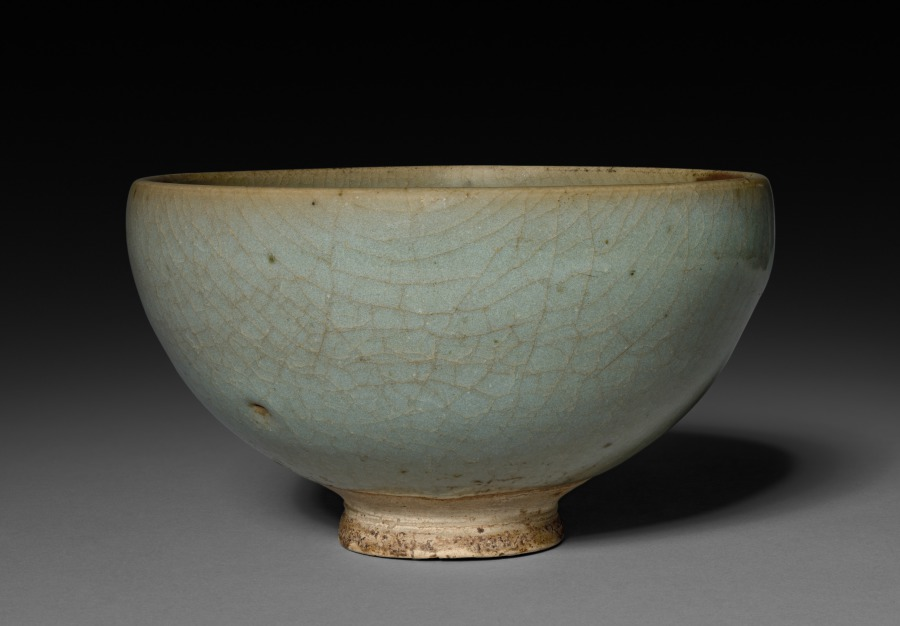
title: Bowl: Jun ware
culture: Northern China, Jin dynasty (1115-1234) - Yuan dynasty (1271-1368)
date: 13th - 14th century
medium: glazed buff stoneware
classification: Ceramic